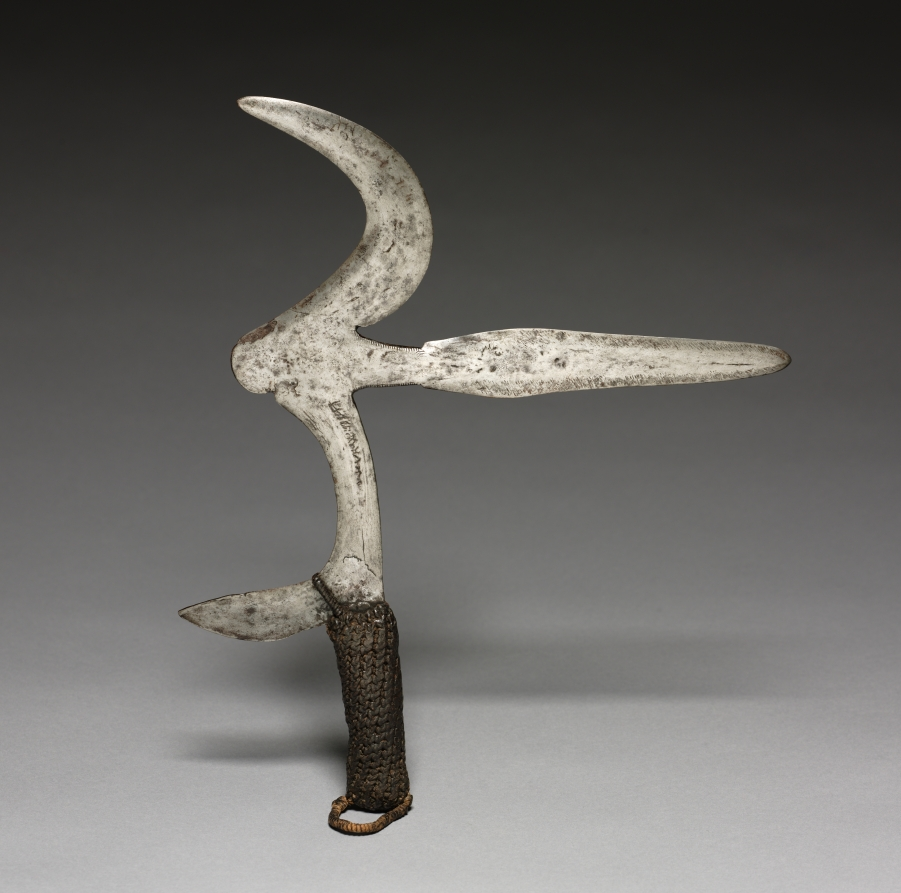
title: Throwing Knife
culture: Africa, Central Africa, Democratic Republic of Congo, unknown maker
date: before 1918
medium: iron and leather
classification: Arms and Armor